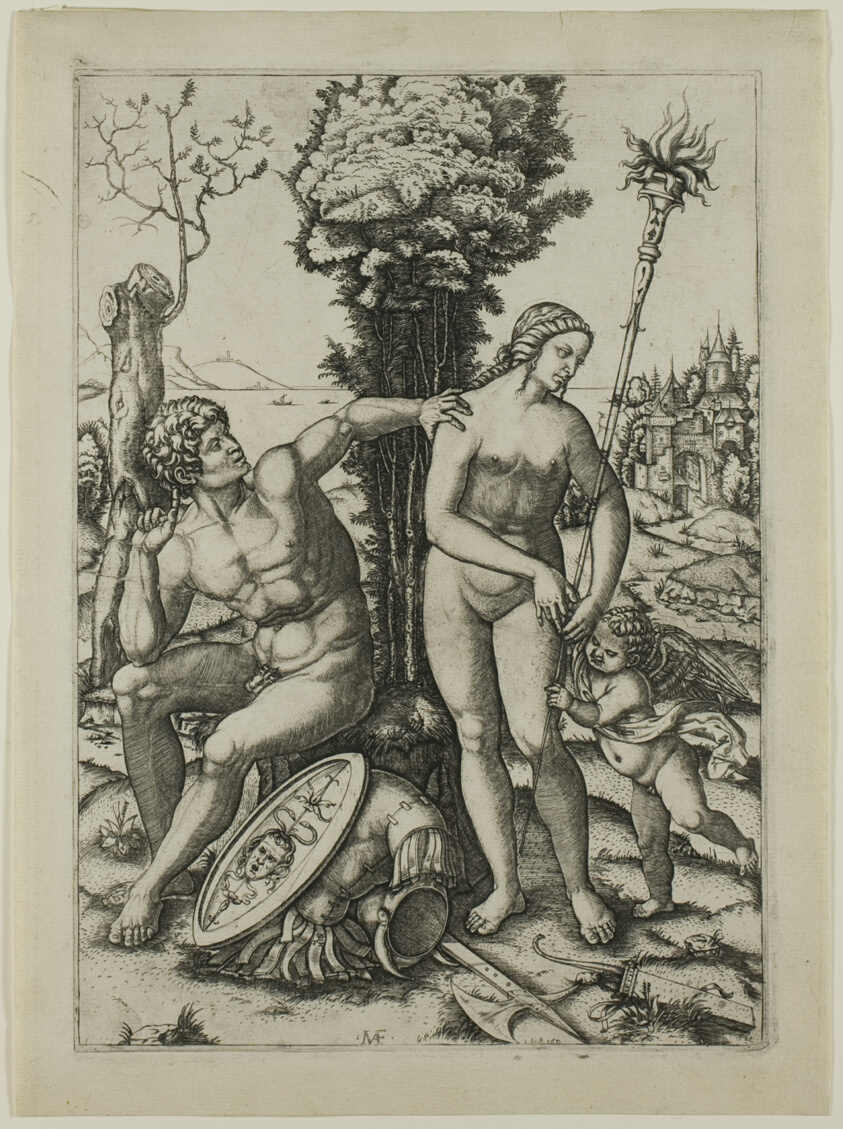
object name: Print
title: Mars, Venus and Cupid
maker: Marcantonio Raimondi (Italian, 1470/82-1527/34)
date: 1508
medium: Engraving in black on cream laid paper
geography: Italy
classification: engraving; paper; print; prints and drawing